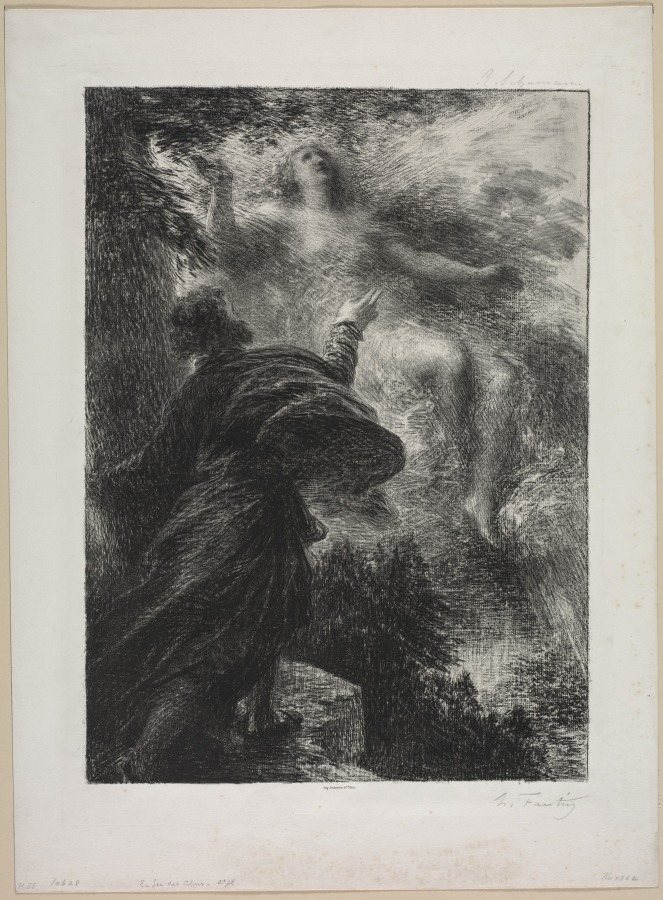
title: The Fairy of the Alps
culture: France, 19th century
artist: Henri Fantin-Latour (French, 1836–1904)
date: 1885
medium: lithograph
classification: Print